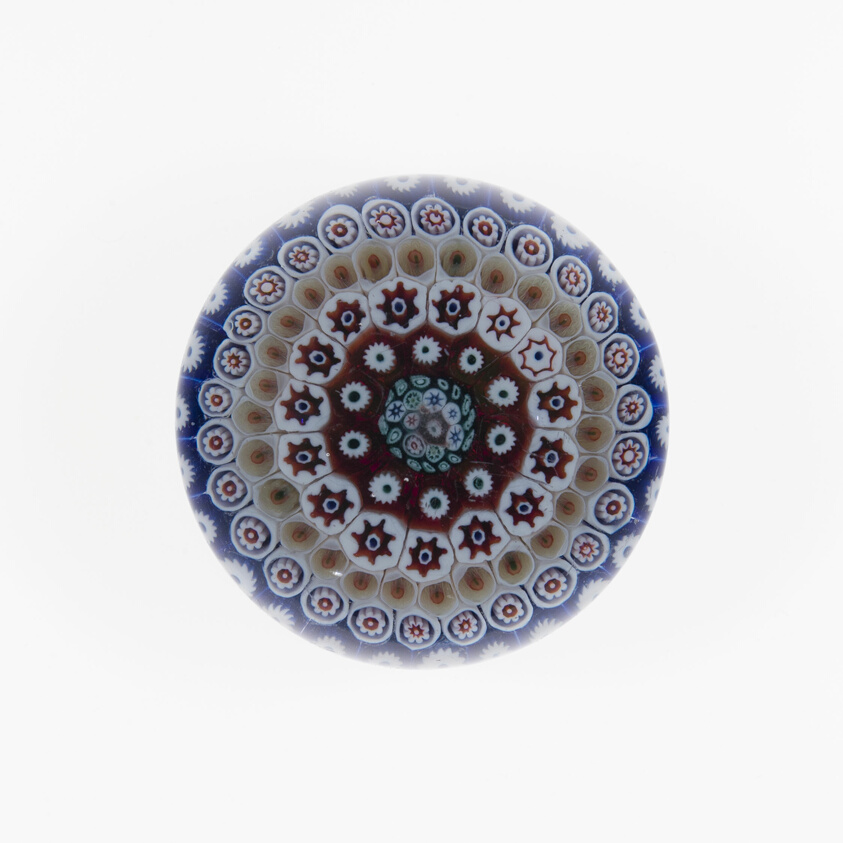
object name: Glass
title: Paperweight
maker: George Bacchus and Sons; Birmingham, England, c. 1817-1882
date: c. 1848–55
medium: Glass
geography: Birmingham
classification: paperweight; glass; european decorative arts